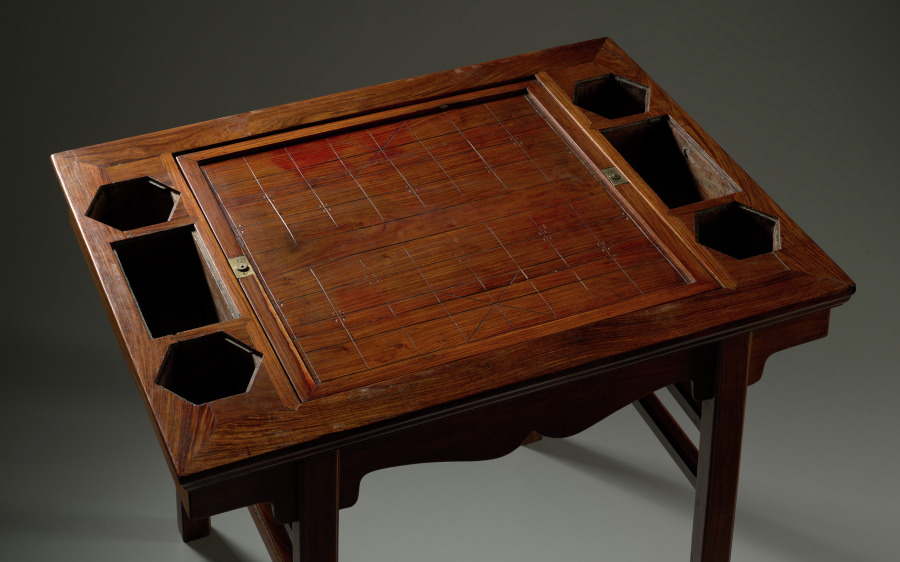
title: Game Table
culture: China, Ming dynasty (1368-1644) - Qing dynasty (1644-1911)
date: 1600s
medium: Rosewood (huanghuali)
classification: Furniture and woodwork